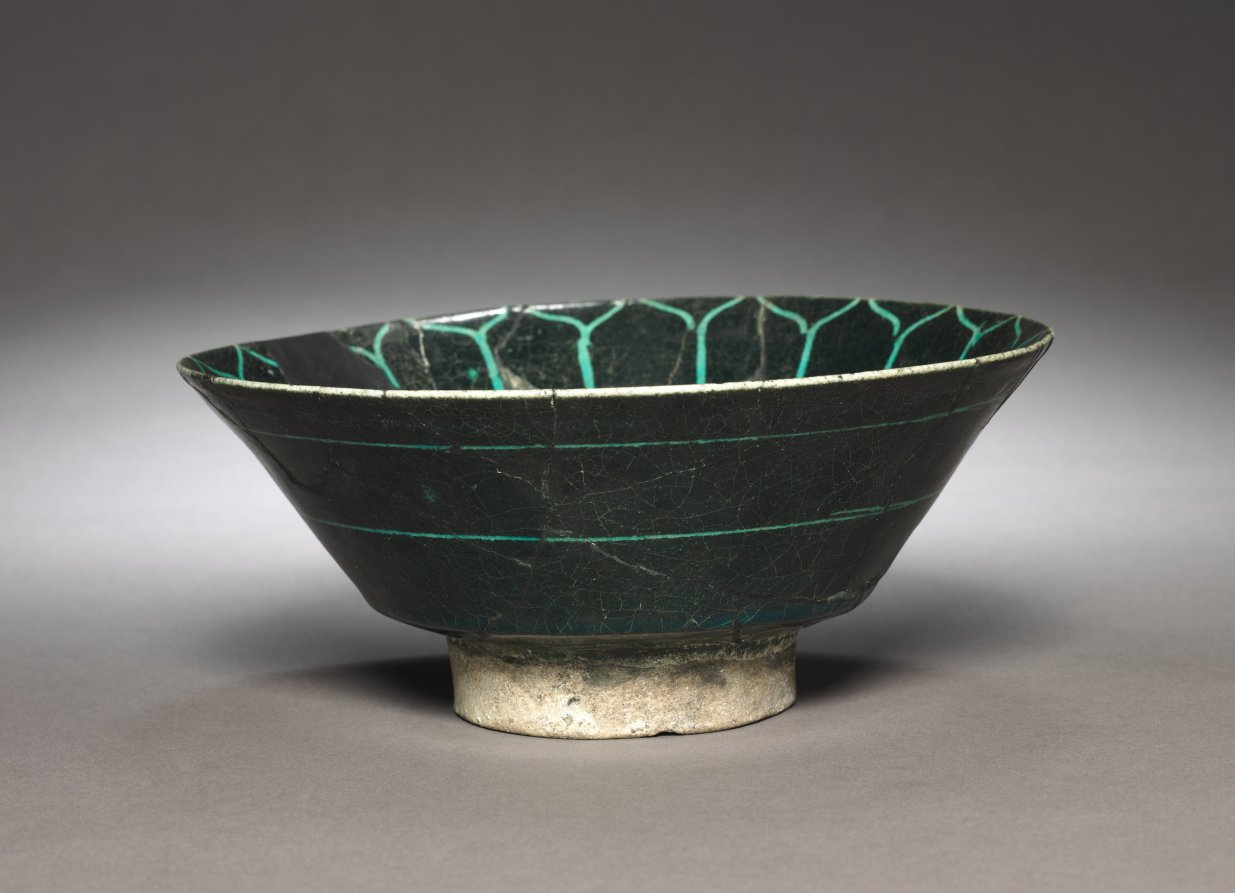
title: Bowl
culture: Iran, Rayy (?), Seljuk Period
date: 1100s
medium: earthenware with underglaze-painted and incised design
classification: Ceramic